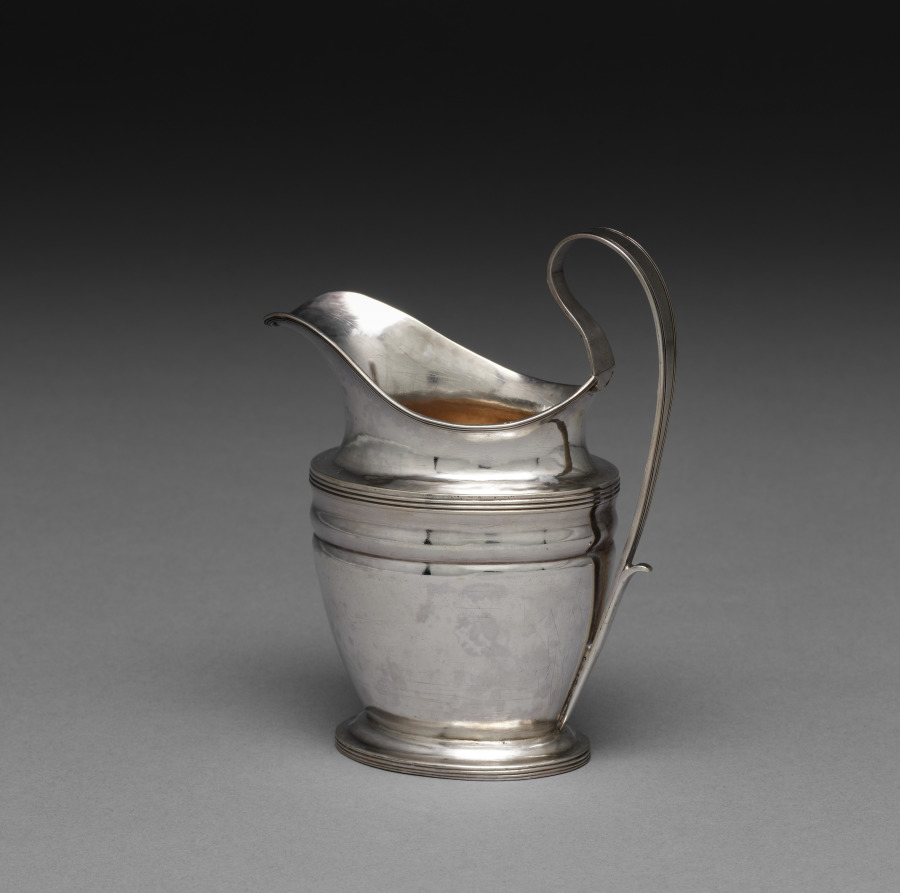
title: Cream Jug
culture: America, Pennsylvania, Philadelphia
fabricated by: John McMullin (American, 1765–1843)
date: c. 1800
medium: silver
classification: Silver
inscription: engraved "JSG" in bright-cut script on side to right of ahndle.